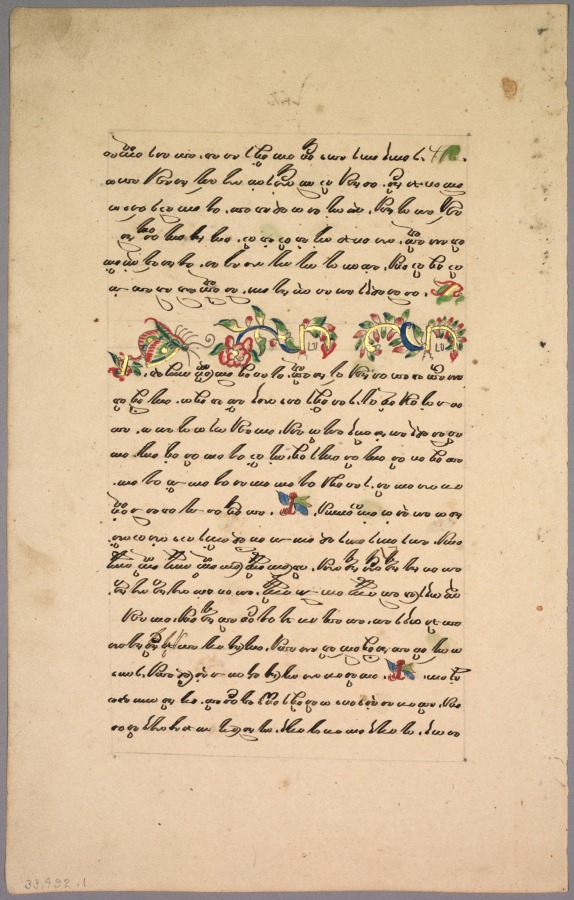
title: Page from Ramayana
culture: Java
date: 1800s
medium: ink on paper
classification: Manuscript